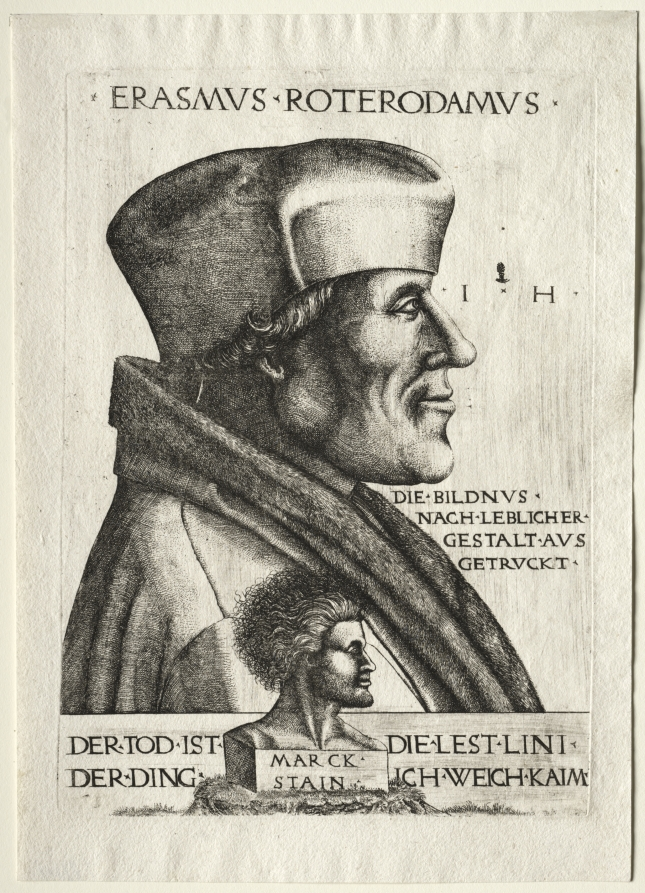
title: Erasmus of Rotterdam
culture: Germany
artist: Hieronymus Hopfer (German)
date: 1528–63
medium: etching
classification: Print